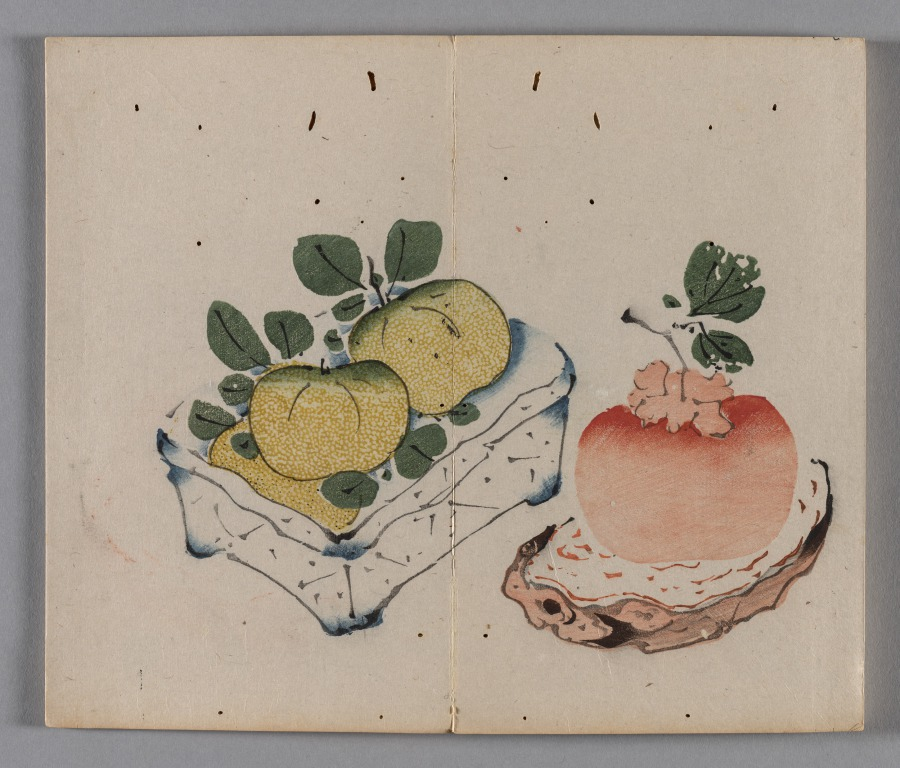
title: Ten Bamboo Studio Painting and Calligraphy Handbook (Shizhuzhai shuhua pu): Fruit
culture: China, Qing dynasty (1644-1911)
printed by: Hu Zhengyan (Chinese, c. 1584–1674)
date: 1633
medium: Woodblock-printed book; ink and colors on paper; first edition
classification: Print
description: Color printing reached a level of perfection in the early 1600s, as seen in this Ten Bamboo Studio Collection of Calligraphy and Painting and the Mustard Seed Garden Manual of Painting (printed 1679 and 1701). The painterly quality, precision in registering (aligning) the woodblocks, and harmonious colors made them the most successful color print editions in Chinese history. Both editions were printed and compiled in Nanjing, spread nationwide, and had a great impact on the arts in Japan and Korea.